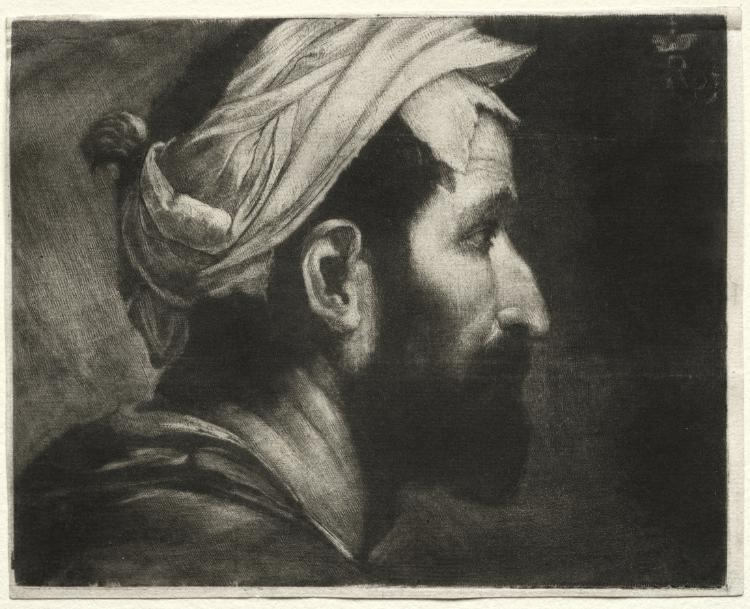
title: The Little Executioner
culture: Germany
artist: Prince Ruprecht (German, 1619–1682)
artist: after Jusepe de Ribera (Spanish, 1591–1652)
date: 1662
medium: mezzotint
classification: Print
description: Prince Ruprecht of the Rhine—a nobleman who was the nephew of England’s King Charles I—was among the earliest practitioners of mezzotint, a printmaking technique first used in Germany in the 1600s. Prince Ruprecht is credited with bringing the technique to England around 1660, where he introduced it to John Evelyn, who was engaged in writing a book on the history of printmaking. Ruprecht created this image (after a painting thought to be by Jusepe de Ribera) to illustrate the mezzotint process in Evelyn’s book, making it the first mezzotint printed in England.